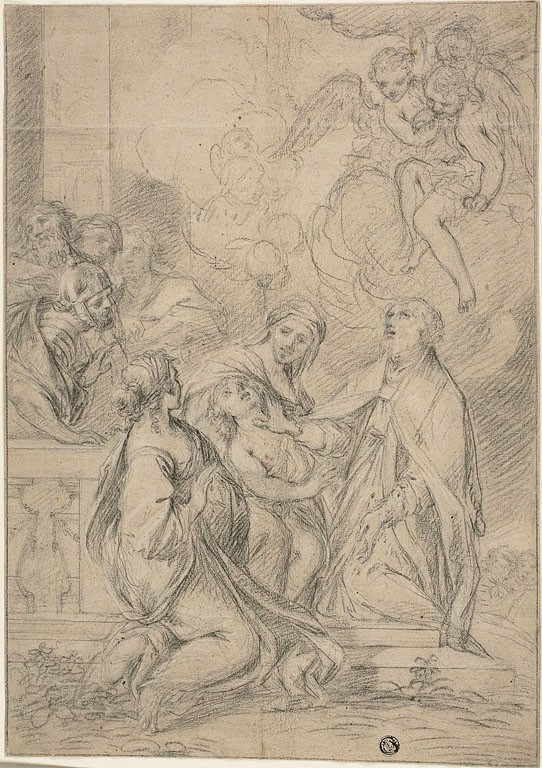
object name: Drawing and Watercolor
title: Saint Healing a Child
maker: School of Carlo Maratti (Italian, 1625-1713)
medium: Black chalk, with traces of white chalk, on cream laid paper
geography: Italy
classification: chalk; drawings (visual works); prints and drawing